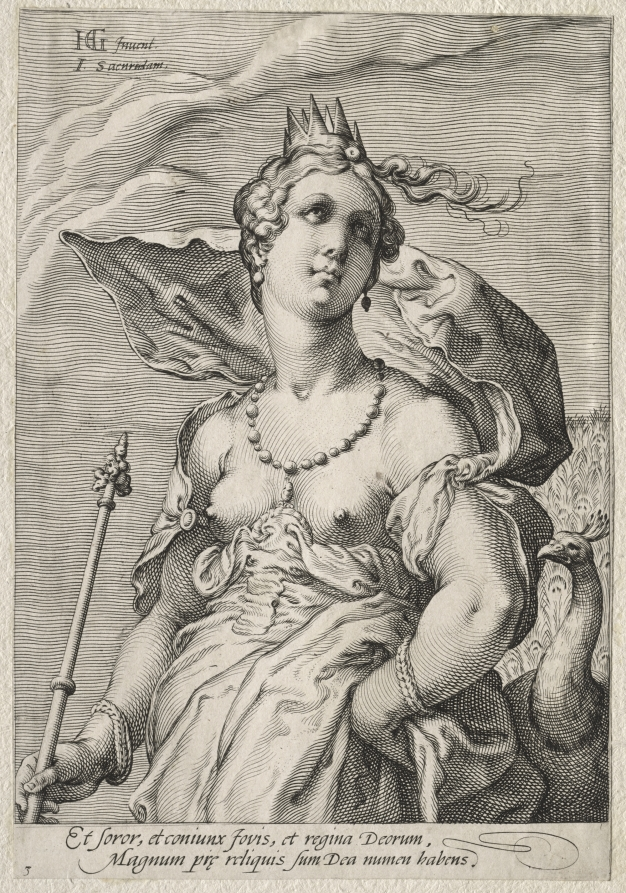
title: Juno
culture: Netherlands, 16th century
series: Three Goddesses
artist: Jan Saenredam (Dutch, 1565–1607)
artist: after Hendrick Goltzius (Dutch, 1558–1617)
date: c. 1595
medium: engraving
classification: Print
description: Goltzius popularized a style of engraving with mesmerizing patterns of curving, tapering, and crisscrossing lines; it was especially appreciated in the late 1500s. Designed for his pupil Saenredam to engrave, these prints depict the three goddesses from the tale of The Judgment of Paris, in which each claimed the golden apple awarded to the most beautiful. Jupiter deferred judgment to Paris, a mortal esteemed for his fair-mindedness. Juno and Athena tried to bribe Paris with an empire and skill in war, but Venus made him an offer he could not resist: Helen, the world’s most beautiful woman. The peacock identifies Juno, queen of the gods and the jealous wife (and sister) of Jupiter. Clad in armor, Pallas Athena is the goddess of wisdom, the arts, and warfare; an owl is her sage companion. The presentation of the deities in separate prints suggests that viewers may also play Paris’s role and decide themselves which goddess the artists made most beautiful.